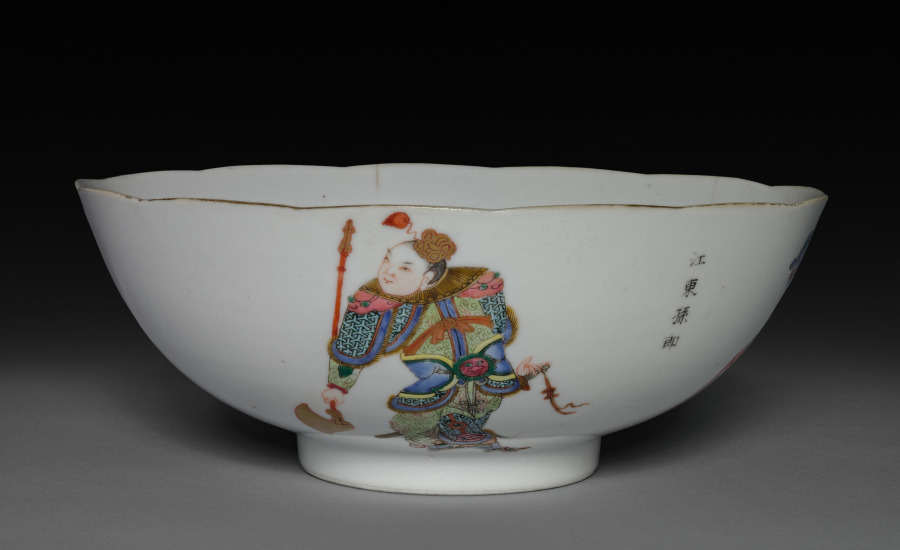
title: Bowl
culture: China, Qing dynasty (1644-1911)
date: 1821–1850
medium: porcelain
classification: Ceramic